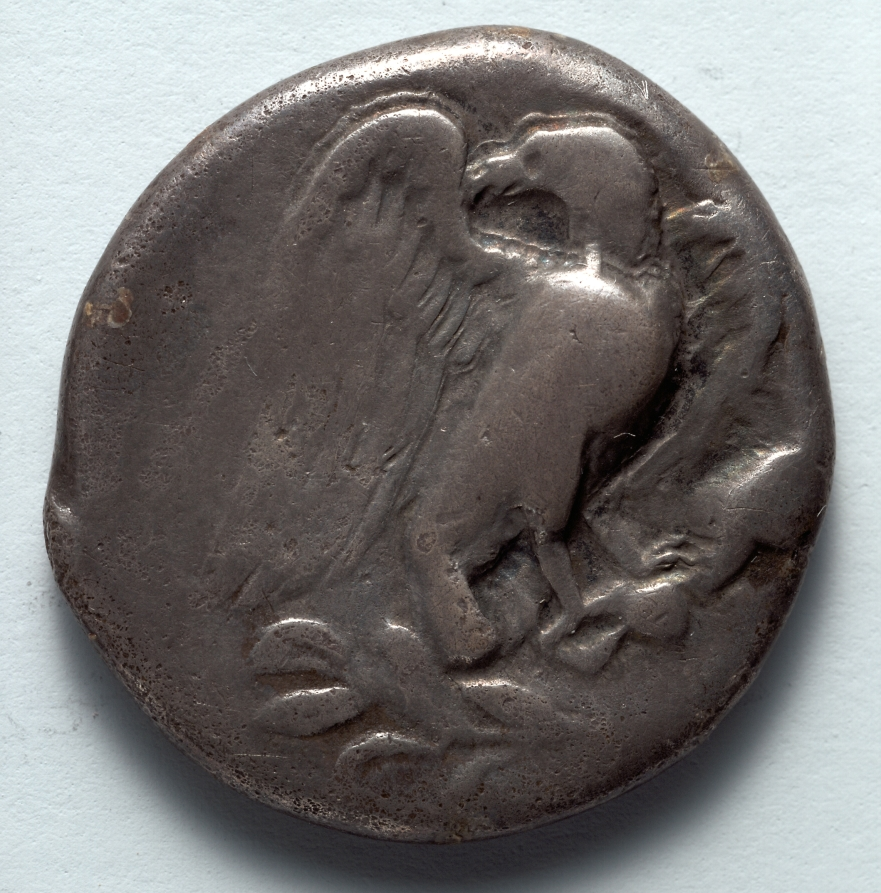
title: Stater: Eagle (obverse)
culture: Greek, minted in Elis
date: c. 432–421 BCE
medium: silver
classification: Coins